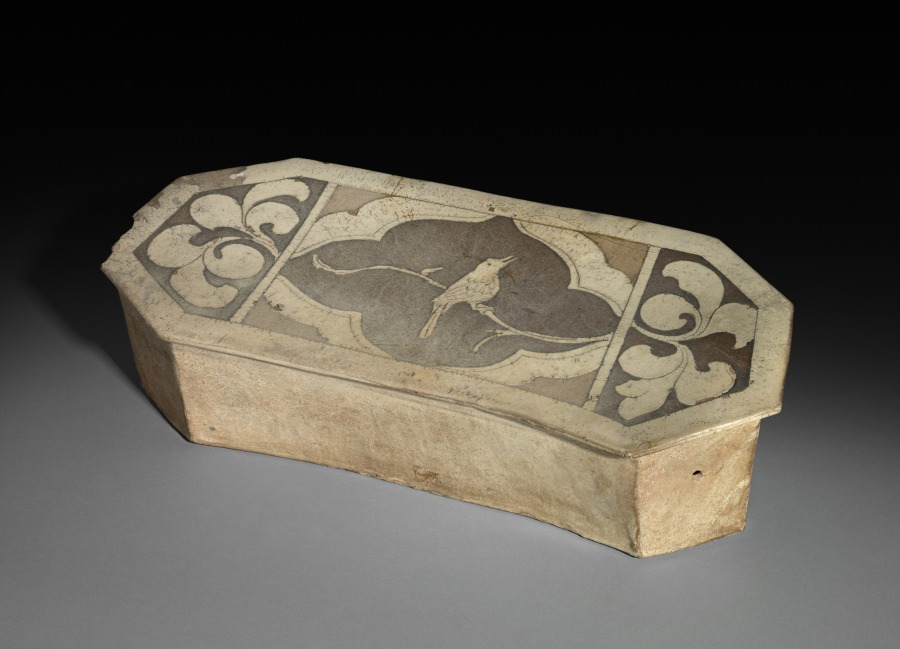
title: Pillow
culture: China, Northern Song dynasty (960-1127)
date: 1000s–1100s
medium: Buff stoneware with carved underglaze slip decoration, Cizhou ware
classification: Ceramic